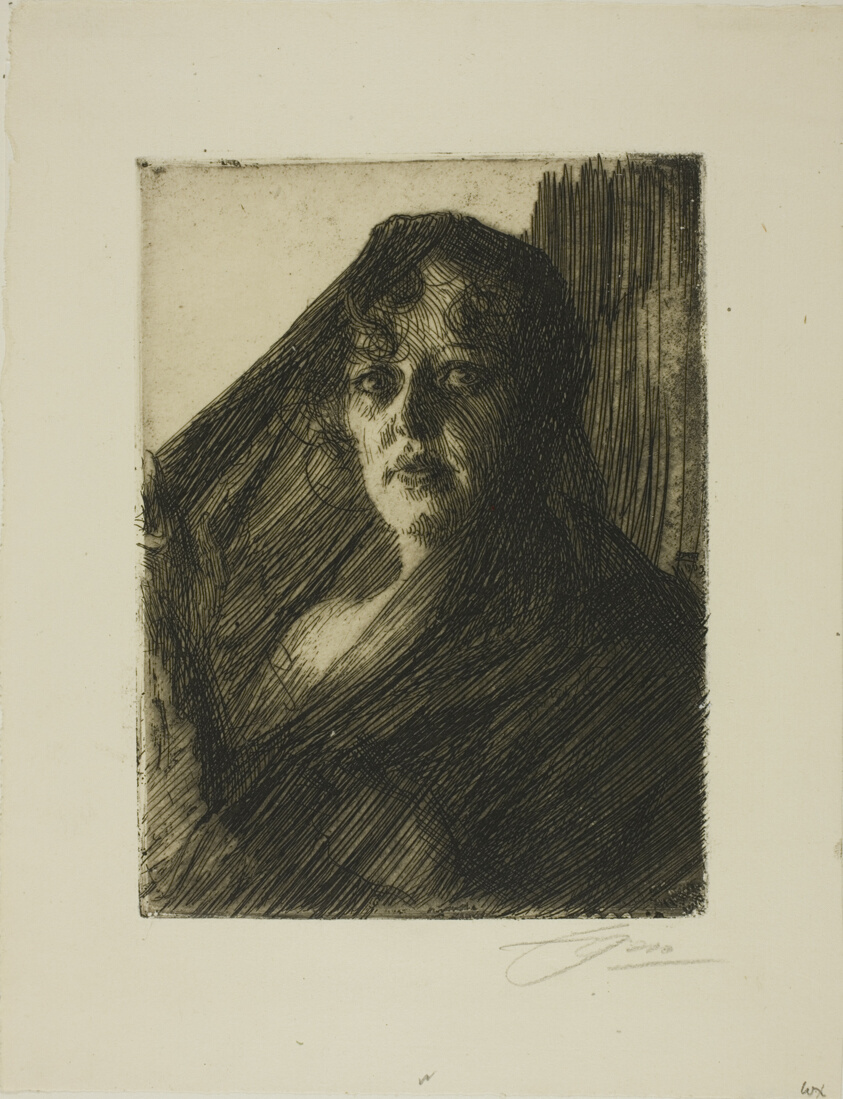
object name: Print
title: Gerda Lundequist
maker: Anders Zorn (Swedish, 1860-1920)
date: 1909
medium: Etching on ivory laid paper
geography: Sweden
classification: etching; print; prints and drawing